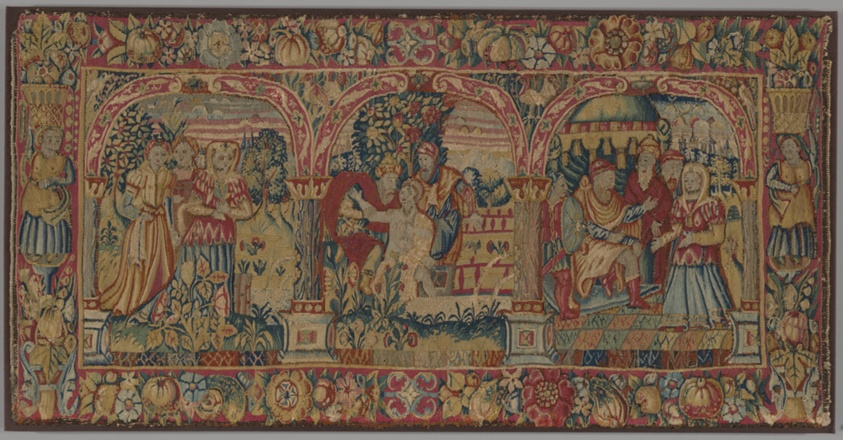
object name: Coverings and Hangings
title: Susanna and the Elders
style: 17th Century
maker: English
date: early 17th century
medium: Silk, wool, and linen, slit, and single interlocking tapestry weave, with eccentric wefts; and metal strip-wrapped-silk outlining wefts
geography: England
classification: weaving - tapestry; tapestry; textile; weaving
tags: Christian subjects, bathing, botanical/floral, columns, fruit, people, trees